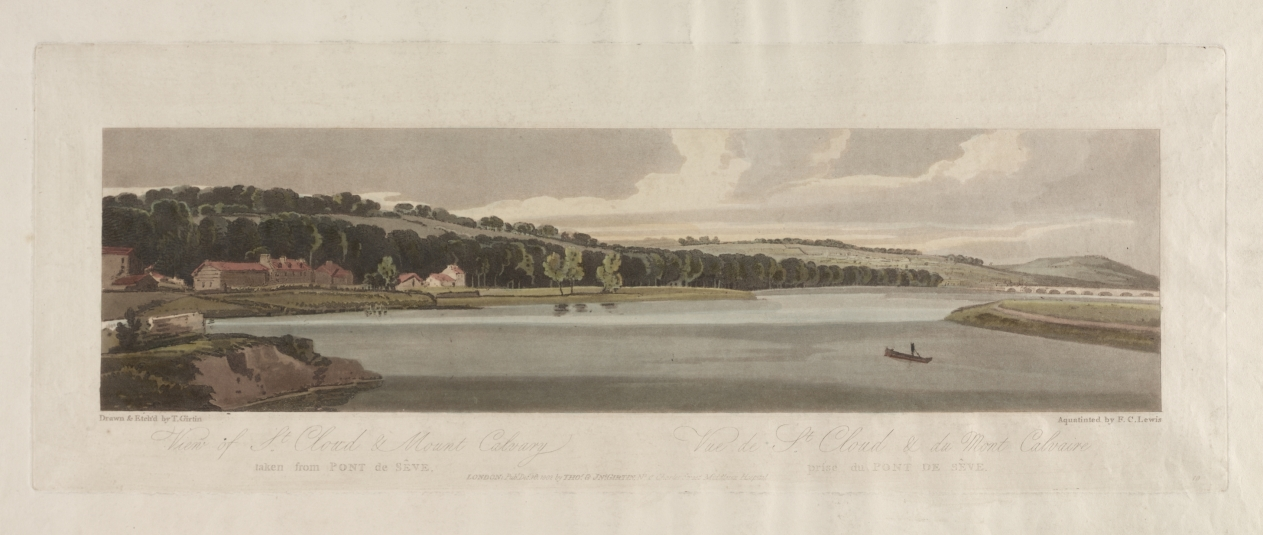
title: A Selection of Twenty of the Most Picturesque Views in Paris: View of St. Cloud & Mount Calvary taken from Pont de Sêve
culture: England, 19th century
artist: Thomas Girtin (British, 1775–1802)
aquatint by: Frederick Christian Lewis (British, 1779–1856)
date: 1802, printed 1810 or after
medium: softground etching and aquatint printed in brown, hand-colored with watercolor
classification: Print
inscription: In plate; Drawn & Etch'd by Thos Girtin; Aquatinted by F. C. Lewis; LONDON: Pubd Decr 16, 1802 by Thos & JNo Girtin, No. I, Little Newport Street, Gerrard Street, Soho.